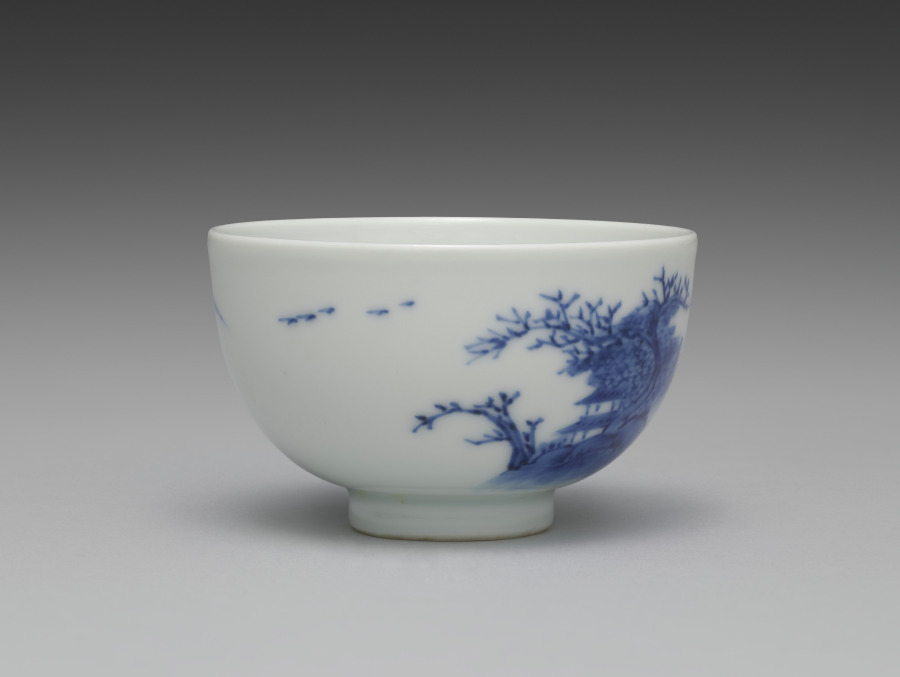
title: Teacup from Tea Set with Chinese Landscape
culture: Japan, Meiji period (1868–1912)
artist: Seifū Yohei III (Japanese, 1851–1914)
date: 1893–1914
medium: Porcelain with underglaze blue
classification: Ceramic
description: The theme of this sencha tea set is the Chinese scholar-recluse in an idyllic landscape. Each of the five teacups has a landscape with an architectural structure and some human activity. This tea set has a side-handled pot called a kyūsu, used for steeping, straining, and serving tea. Unlike some others, this set also has a yuzamashi, a container used to cool boiled water to just the right temperature for the best flavor when steeping. Seifū Yohei III’s painting teacher, Tanomura Chokunyū (1814–1907), made a visual record of famous sencha events that shows how these kinds of porcelains fit with objects such as a stove and kettle to form a complete set of utensils for tea preparation, and with ensembles of decorative objects meant to inspire creativity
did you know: This cup shows a man rowing a little skiff, which disturbs the otherwise still water. Behind him in the distance is an open-air pavilion. He is making his way toward a pair of figures playing a board game, much like the scene on the teapot. Down the hill from them is a residence; beyond this, a flock of geese approaches through the sky.